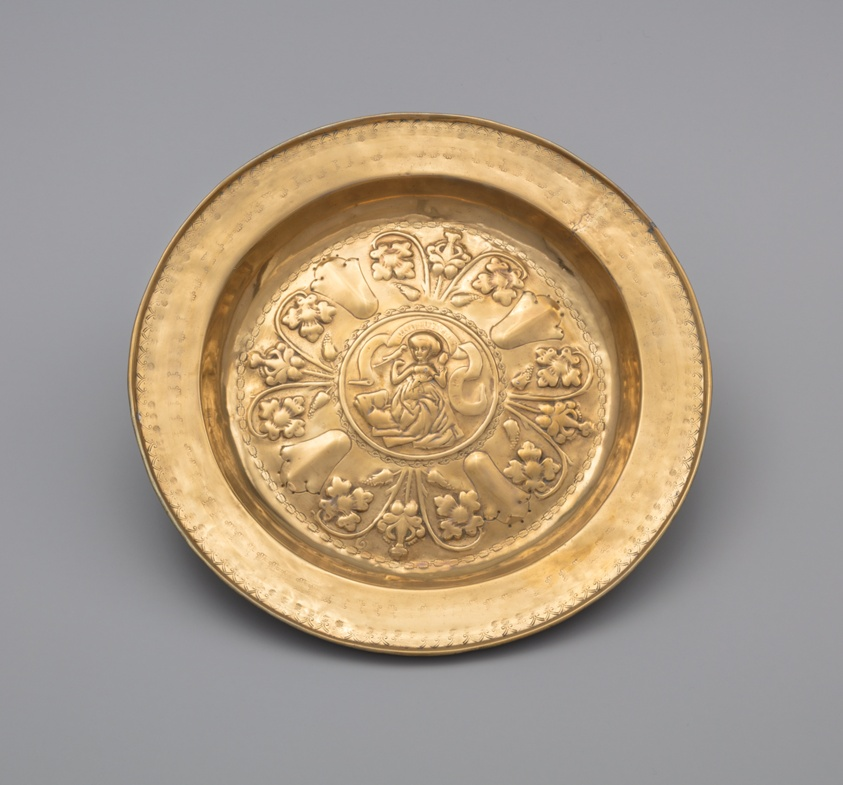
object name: Decorative Arts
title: Plate with a Seated Woman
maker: South Netherlandish or German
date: 1425/1475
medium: Brass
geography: Belgium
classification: earthenware; european decorative arts; ceramics; decorative arts